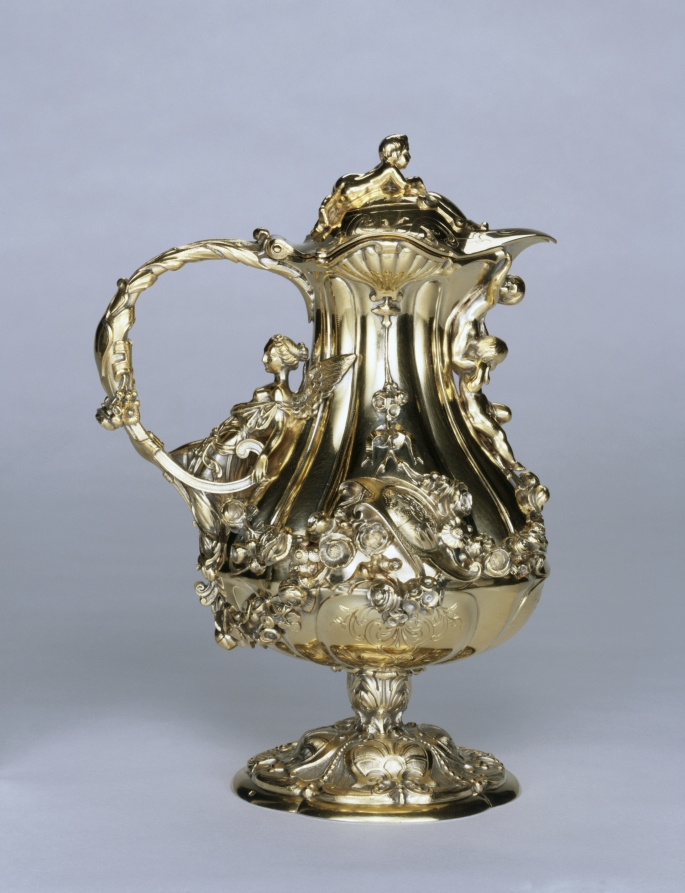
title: Covered Jug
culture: France, 19th century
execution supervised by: Jean-Valentin Morel (French, 1794–1860)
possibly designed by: Jules Dieterle (French, 1811–1889)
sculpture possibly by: Jules Klagmann (French, 1810–1867)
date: c. 1845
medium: gilded silver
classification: Silver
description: The elegance and richness of this ewer demonstrate the high level of technical mastery achieved by its maker. Morel studied under his father, a Parisian lapidary (someone who cuts, polishes, and engraves hard stones), and with Adrien Vachette, a maker of gold boxes. In 1842 he went into partnership with Charles-Edmond Duponchel, which lasted until the late 1840s, at which time he established himself in London, remaining there until 1852, when he returned to Paris. Morel frequentlyfollowed the designs of others, and it has been suggested that in the case of this pitcher his well-known contemporary, Jules Dieterle (1811-1889), may have conceived the overall form. The female figure seems to have been based on a design by the sculptor Jules Klagmann (1810-1867).